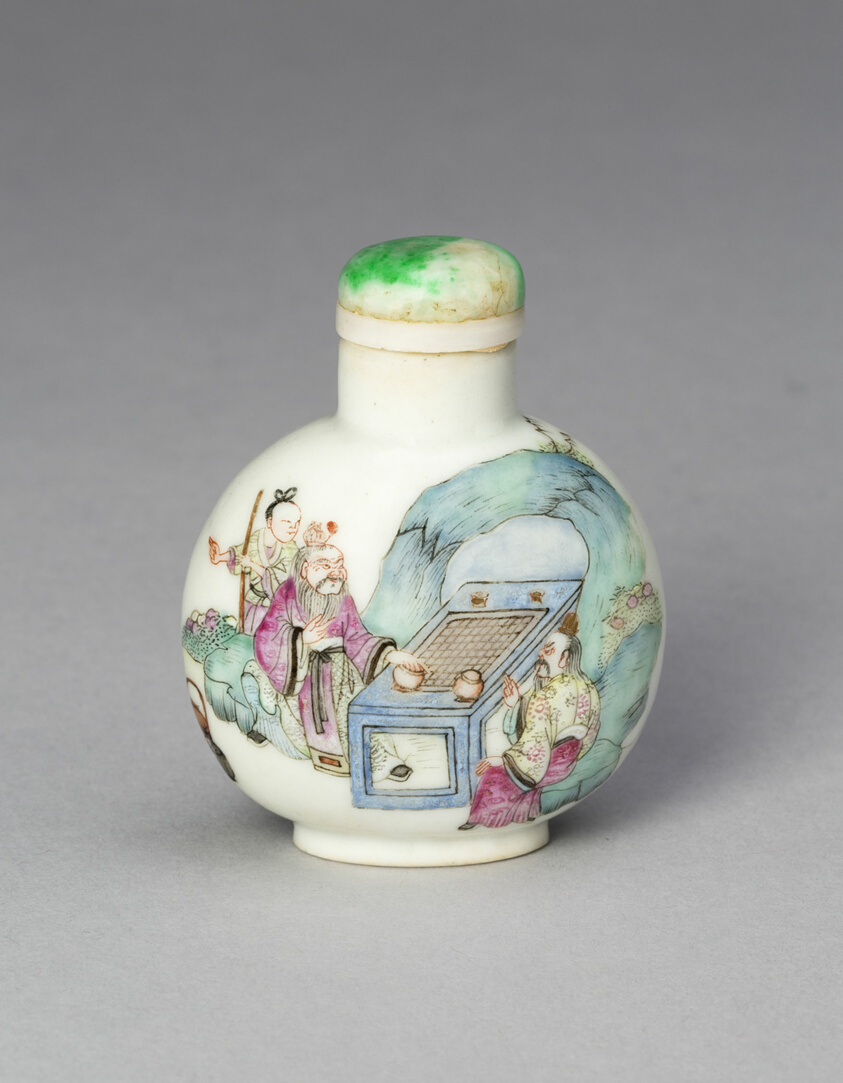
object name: Vessel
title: Snuff Bottle with a Boy, Gentleman, Buffalo, and Two Figures Playing Weiqi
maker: China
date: Qing dynasty (1644–1911), Daoguang reign mark and period (1820–1850)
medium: Porcelain painted in overglaze enamels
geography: China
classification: snuff bottle; porcelain; ceramics; asian art; vessel